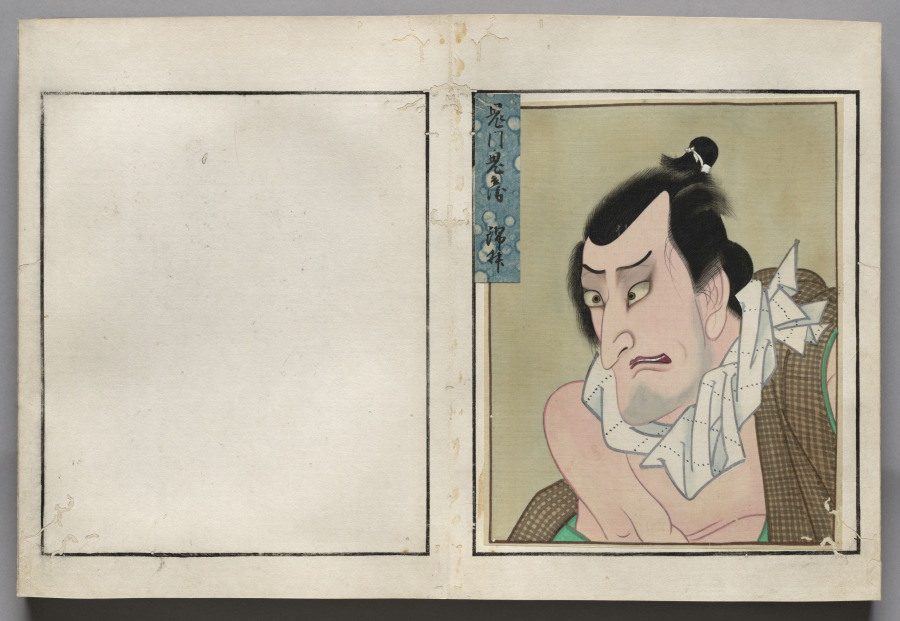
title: Double-Leaf from Album of Actor Portraits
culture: Japan, Edo period (1615–1868)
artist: Shōrakusai (Japanese)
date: c. 1790–1810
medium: double-leaf from an accordion-style album; ink and color on silk (right)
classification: Bound Volume